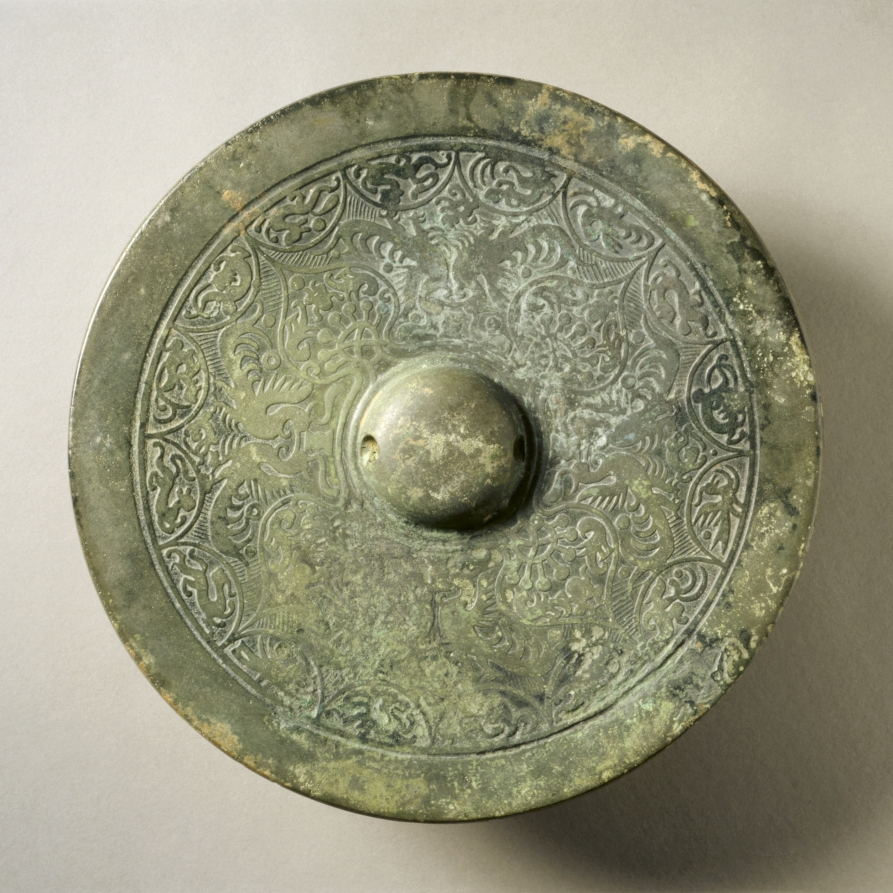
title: Mirror with Quatrefoil, Paired Phoenixes, and Auspicious Animals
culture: China, Three Kingdoms (221–280 CE)–Western Jin dynasty (265–316 CE)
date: 221–316 CE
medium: bronze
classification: Metalwork